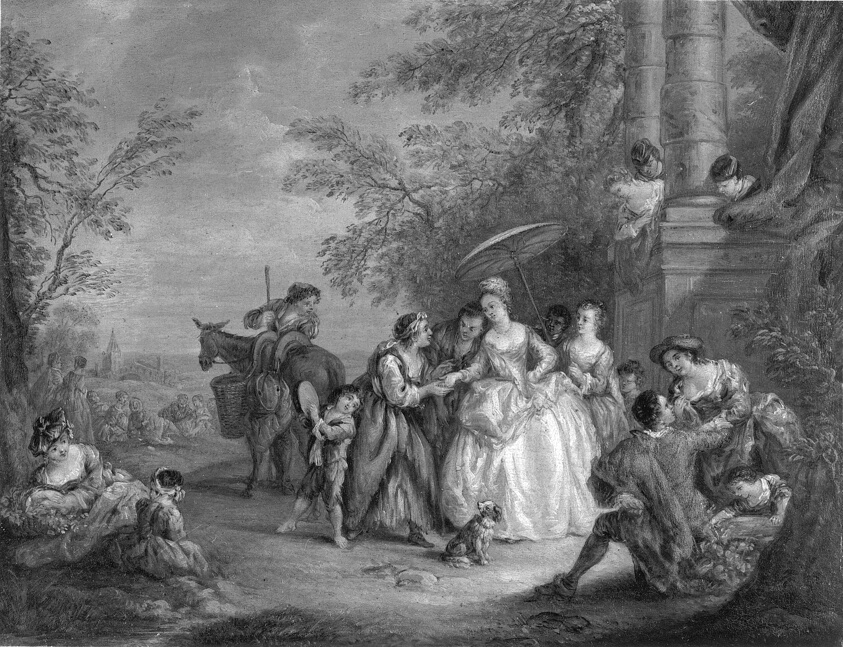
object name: Painting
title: La Bonne Aventure (The Fortune Teller)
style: 18th Century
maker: After Jean Baptiste Joseph Pater (French, 1695–1736)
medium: Oil on panel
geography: France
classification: painting; paint; oil paintings (visual works); oil on canvas; french; european painting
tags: people, women, men, children, musical instruments, music, dog, dogs, animals, parasols, woman with children, trees, nature, building, towns, leisure, architechture, architecture, architecture, wealth, fashion, luxury, poverty, basket, foliage